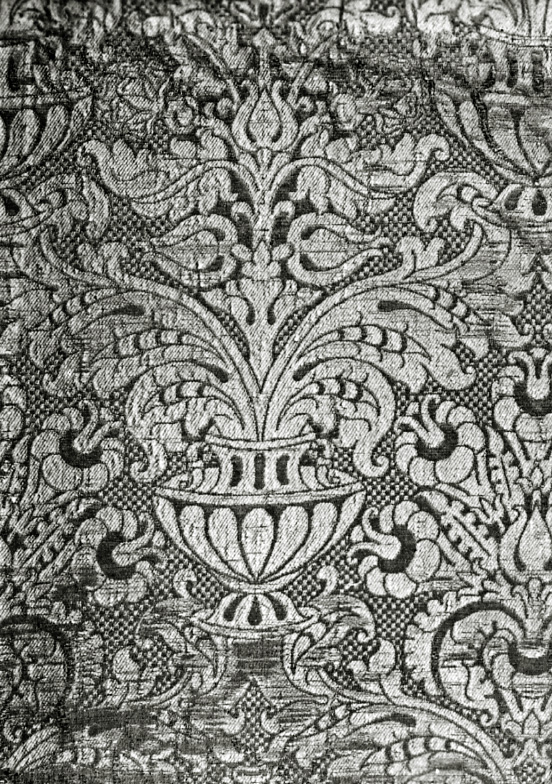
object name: Textile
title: Fragment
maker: Italy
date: 16th century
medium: Fancy compound satin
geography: Italy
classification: textile; weaving